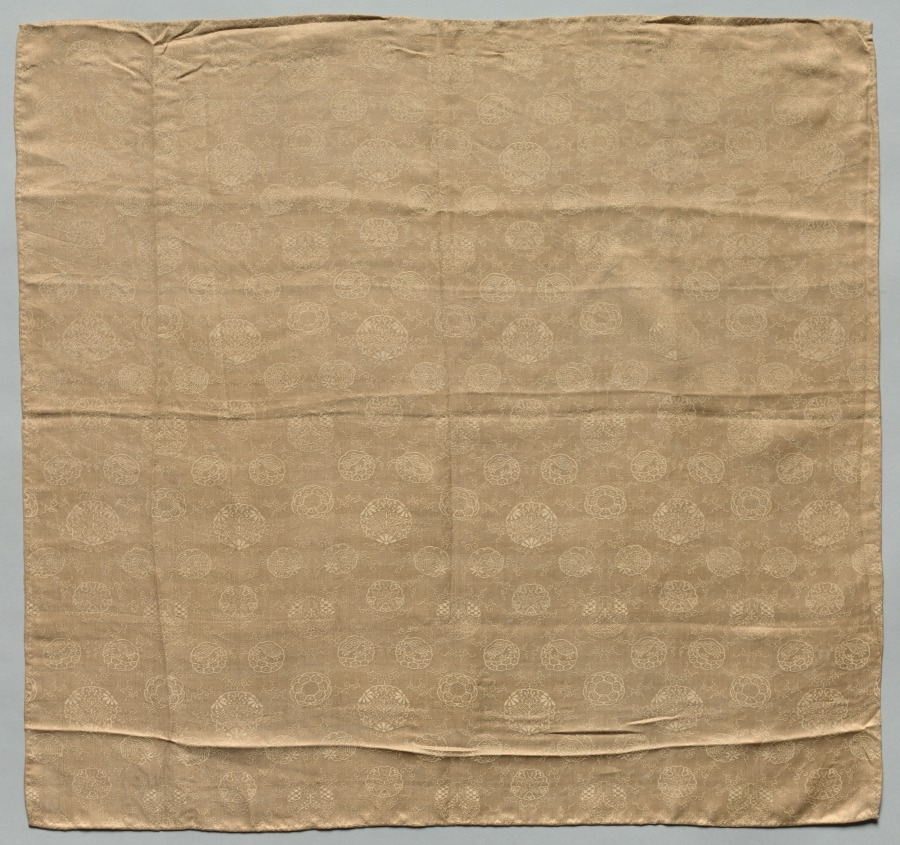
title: Fragment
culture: China, 19th century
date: 1800s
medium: silk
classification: Textile